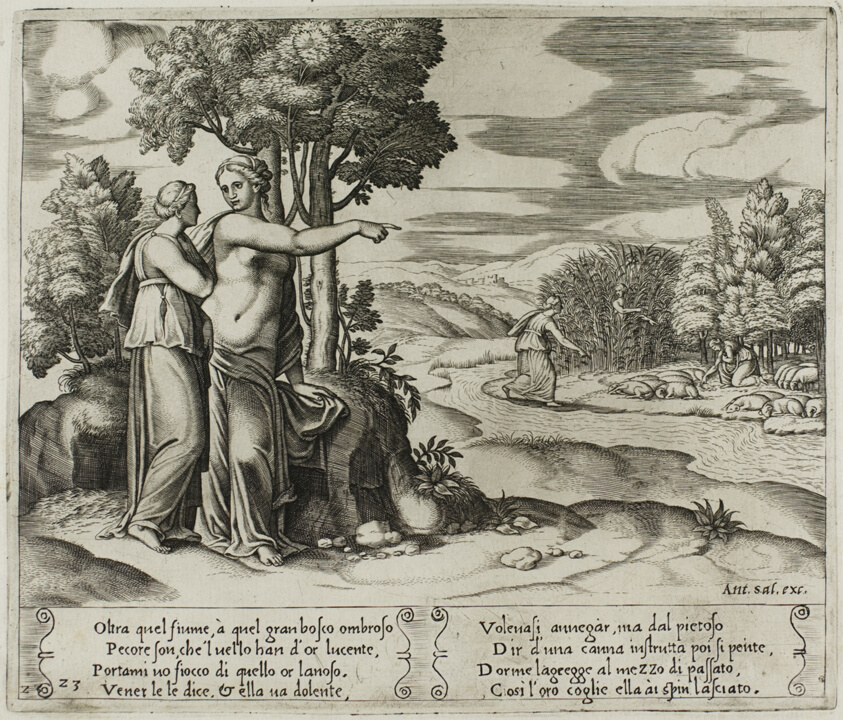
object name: Print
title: Psyche Going to Seek the Golden Wool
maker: Master of the Die (Italian, active c. 1530-1560); after Michiel Coxcie I (Flemish, 1499-1592); in turn, inspired by Raffaello Sanzio, called Raphael (Italian, 1483-1520)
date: 1530/40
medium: Engraving in warm brown ink on cream laid paper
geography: Italy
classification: engraving; print; prints and drawing